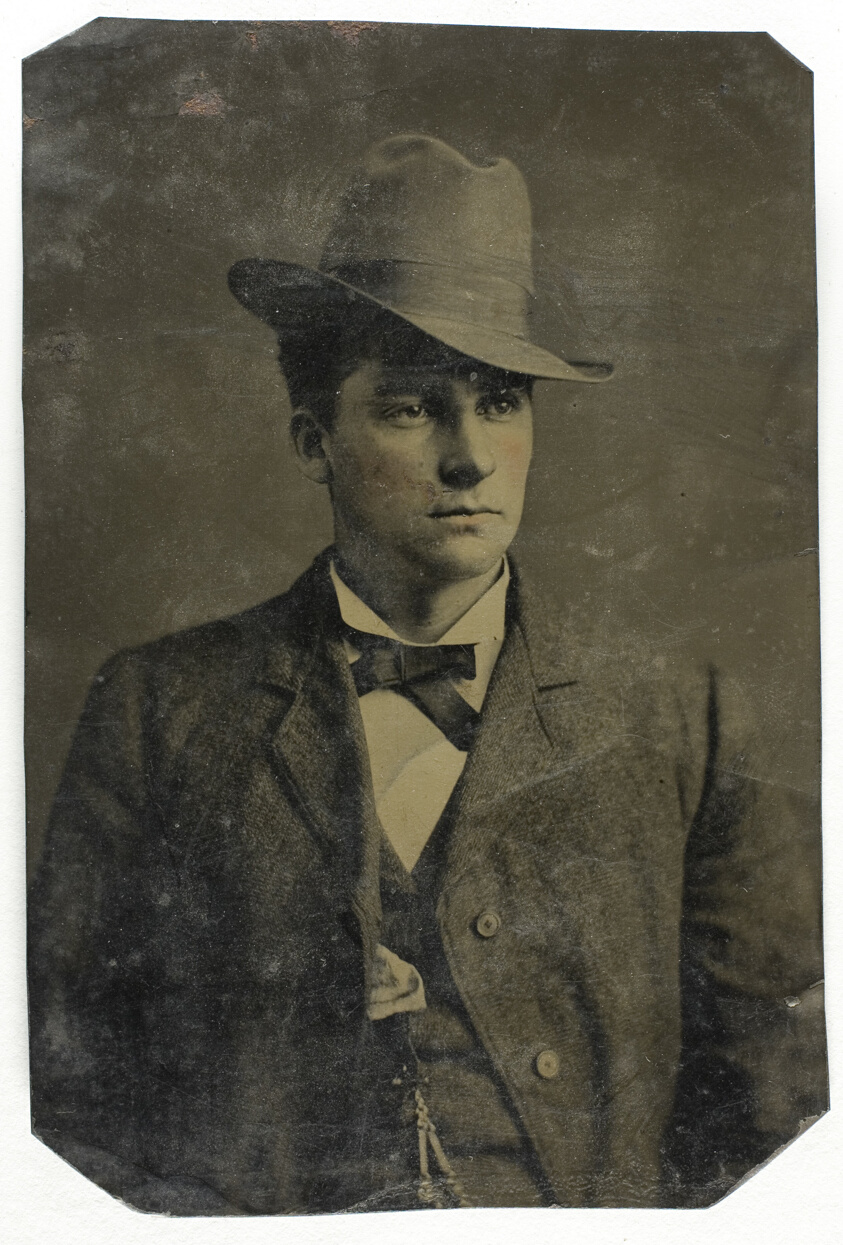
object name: Photograph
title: Untitled (Portrait of Man with Hat)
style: 19th century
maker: Artist unknown; 19th century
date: 1850/99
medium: Tintype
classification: photography; photograph